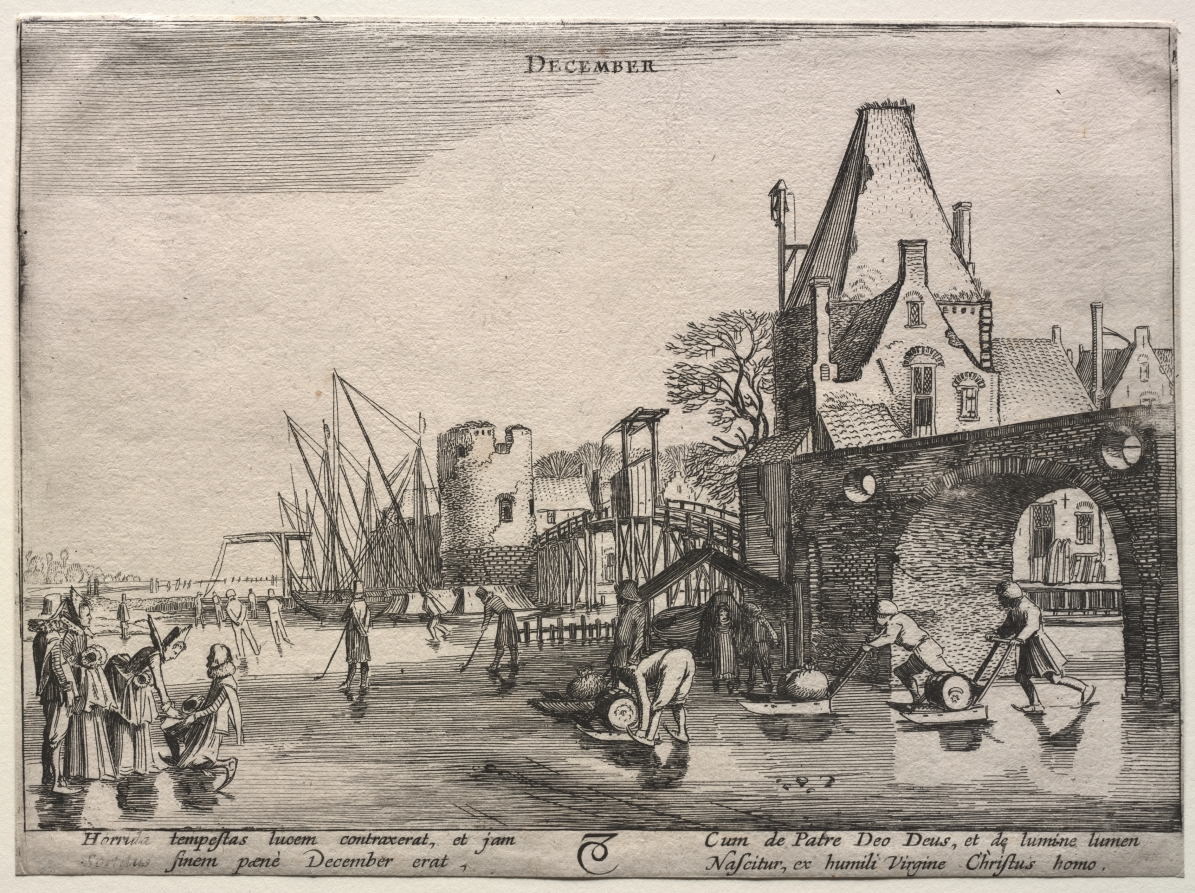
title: The Twelve Months: December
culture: Netherlands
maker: Jan van de Velde II (Dutch, 1593–1641)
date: 1608–18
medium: etching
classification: Print